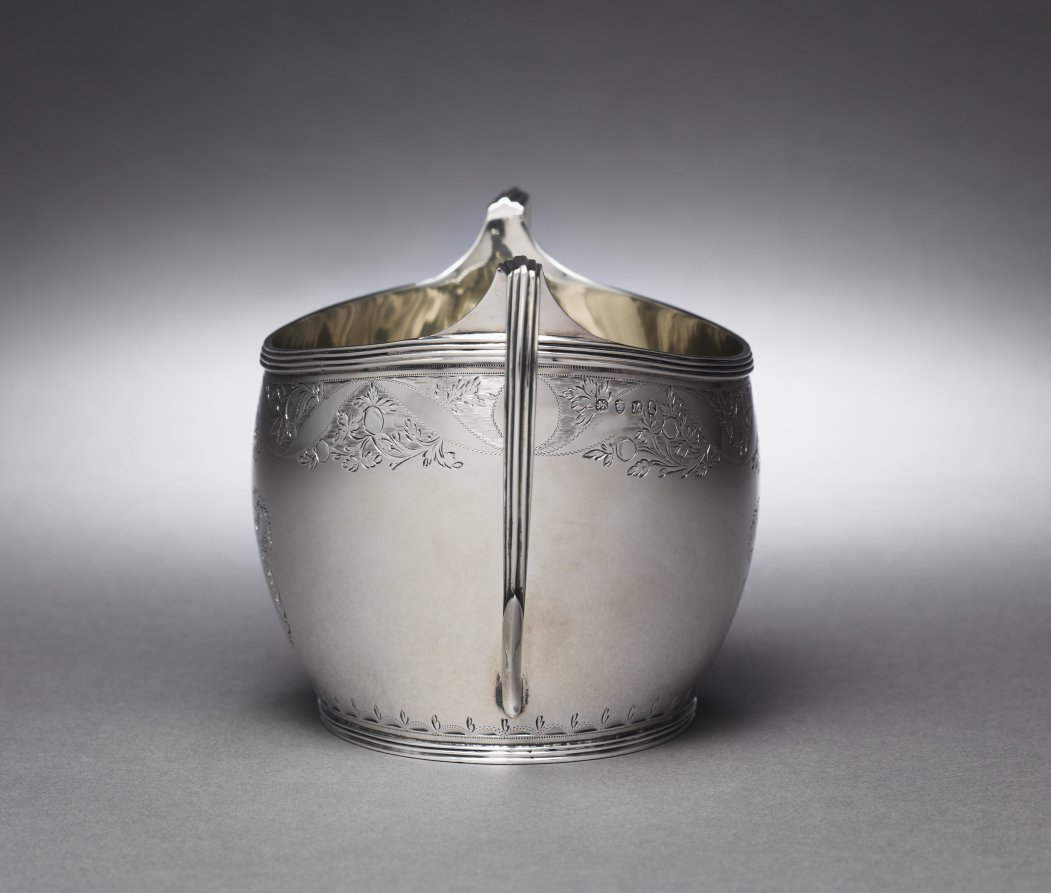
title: Tea Service (Sugar Bowl)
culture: London, England, 19th century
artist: Anne Bateman (British, 1748–1813)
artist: Peter Bateman (British, 1740–1825)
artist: William (I) Bateman (British, 1774–1850)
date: 1807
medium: silver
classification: Silver